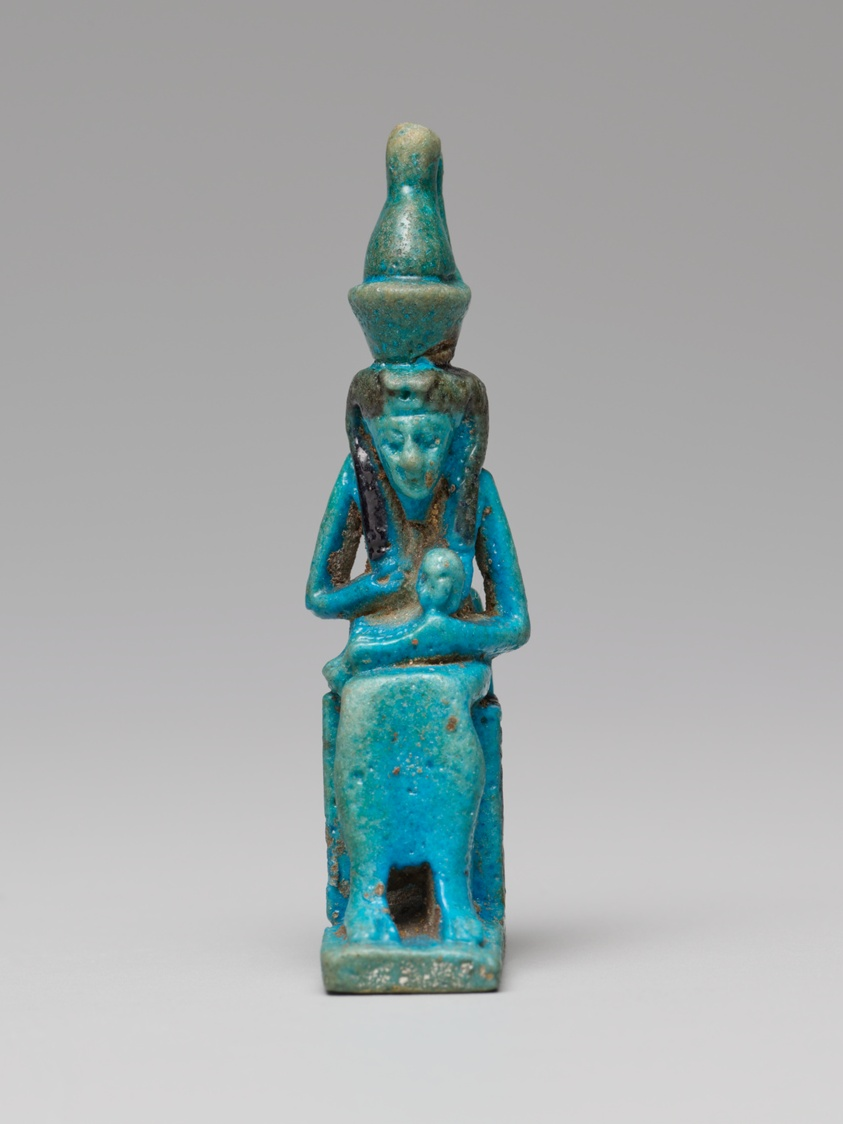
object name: Costume and Accessories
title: Amulet of Mut and Khonsu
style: third intermediate period, late period (egyptian), egyptian, ancient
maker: Egyptian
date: Third Intermediate Period (about 1069–664 BCE)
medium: Faience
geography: Egypt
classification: amulet; jewelry; ceramics; ancient art; costume; faïence (composite material)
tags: goddesses, children, gods (deities), nursing (breast feeding)